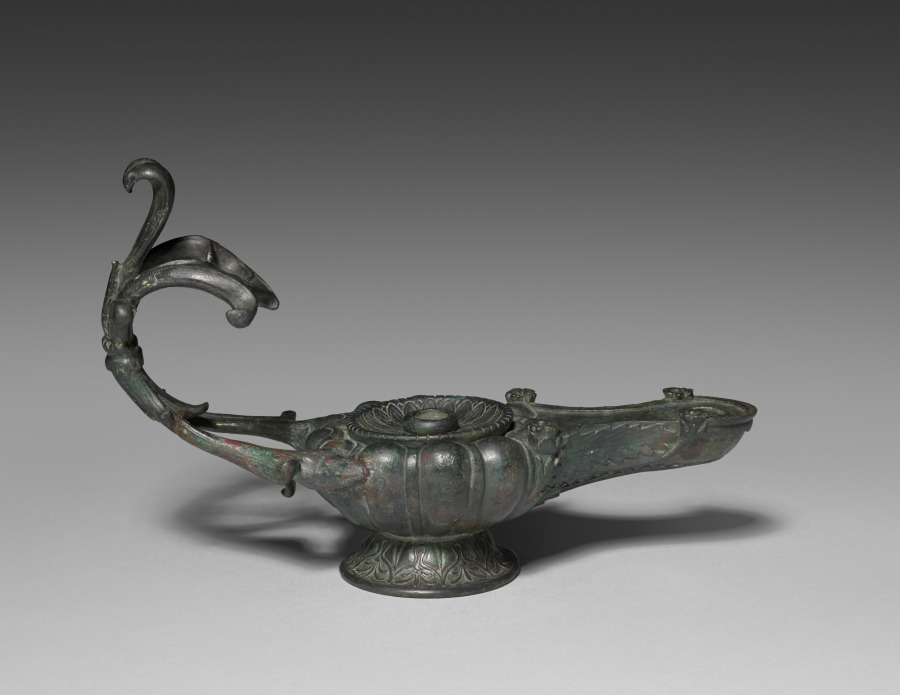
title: Oil Lamp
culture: Roman, late Republican-early Imperial (c. 50 BCE – 50 CE)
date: c. 50 BCE–50 CE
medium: Bronze, cast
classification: Metalwork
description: This large and ornate cast bronze oil lamp features a central hole for filling and a single spout for its wick. Its extravagant handle rises to create both a loop and a sort of hook, one or both of which may have served to suspend the lamp when lit. Alternatively, the lamp may have stood on its own, perhaps atop a tall lampstand. While its primary function may have been for lighting dark spaces, this lamp must also have served an ornamental purpose.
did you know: When used, this lamp likely hung from the ceiling or stood on a tall lampstand.